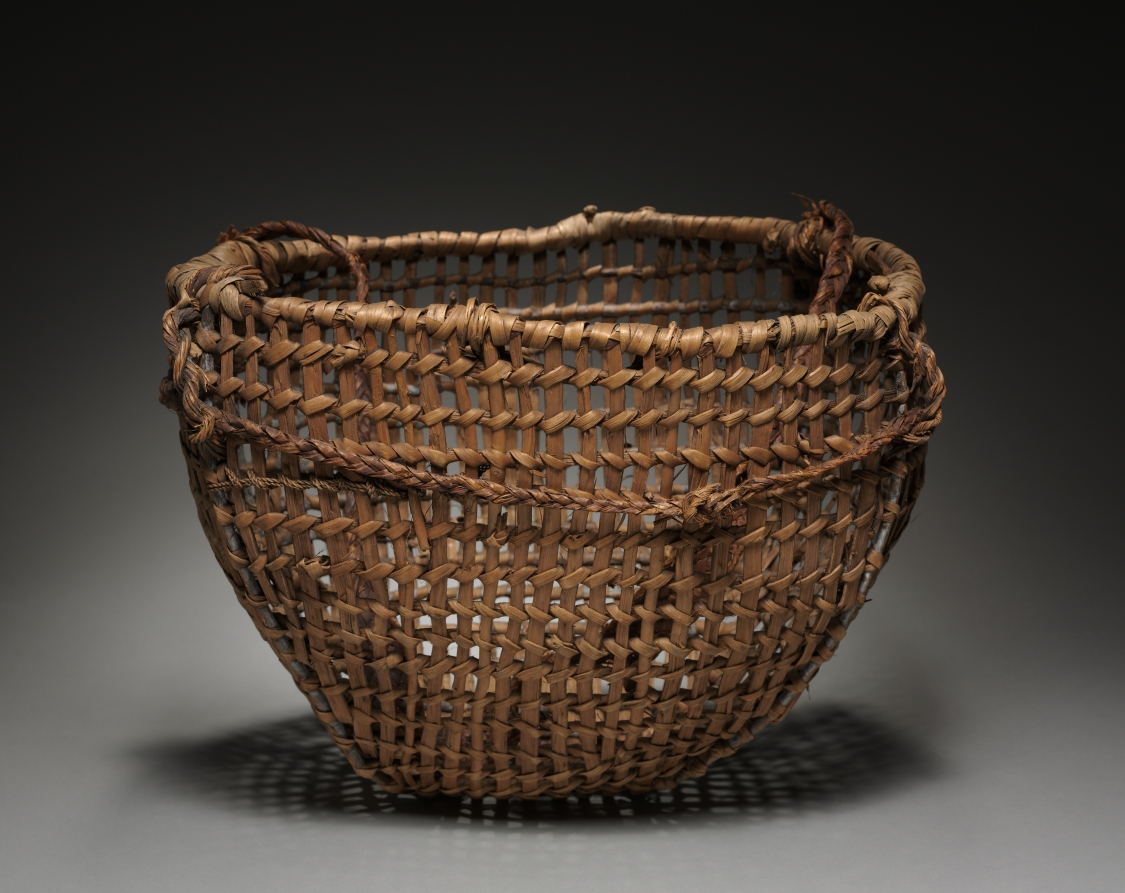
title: Clam basket with Tump Line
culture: Northwest Coast, Klallam, late 19th century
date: late 1800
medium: Cedar root; openwork, braided, plaited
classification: Basketry